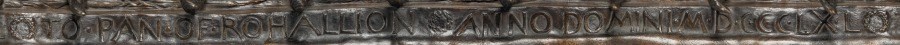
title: Pan of Rohallion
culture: America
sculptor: Frederick William MacMonnies (American, 1863–1937)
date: 1890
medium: bronze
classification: Sculpture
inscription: Signed on globe: Frederick MacMonnies, Paris 1890. © 1894. Inscribed around base: TO PAN OF ROHALLION ANNO DOMINI MDCCCLXL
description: Rohallion in the title refers to the name of an estate in New Jersey, whose owner commissioned MacMonnies to create a large fountain of this design for a garden pool. Later, the artist made several smaller versions, such as this example. Here, the ancient Greek god Pan plays his musical pipes while standing on an orb supported by fish.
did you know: The character of Peter Pan, including his flute playing, references the Greek god Pan.